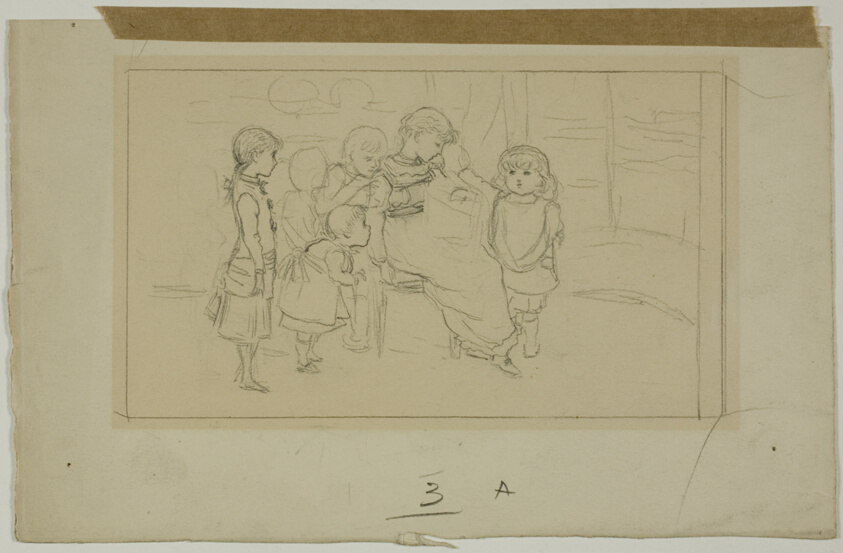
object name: Drawing and Watercolor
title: Group of Children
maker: Kate Greenaway (English, 1846-1901)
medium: Graphite on cream wove paper (discolored to tan)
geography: England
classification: graphite; drawings (visual works); prints and drawing